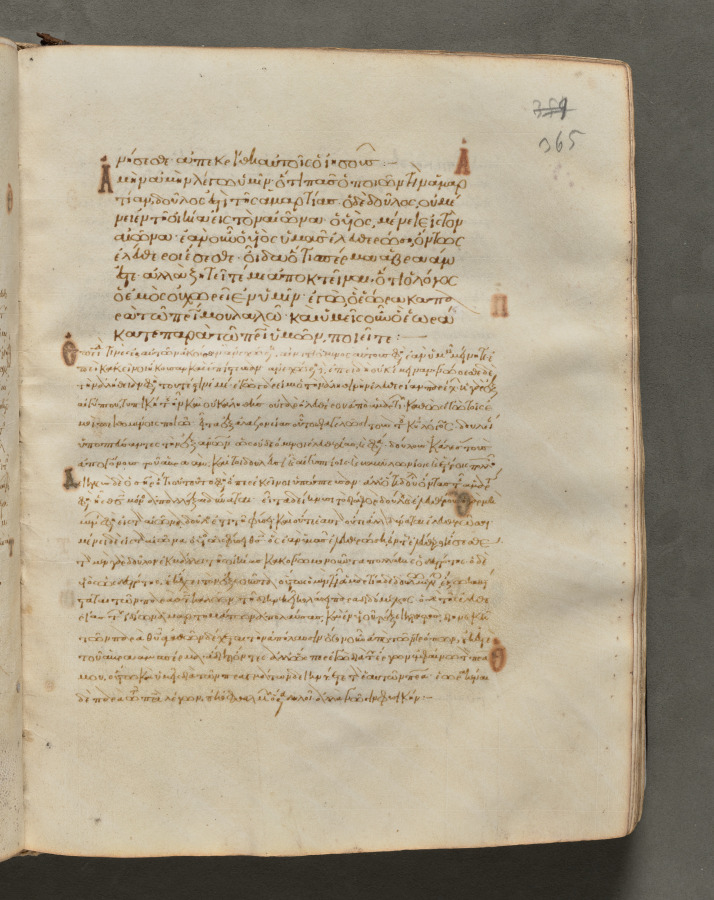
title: Text, folio 365 (recto), from a Gospel Book with Commentaries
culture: Byzantium, Constantinople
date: c. 1000–1100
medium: ink, tempera, and gold on vellum; leather binding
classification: Bound Volume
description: Each of the four gospels in this book opens on a page with brilliantly illuminated borders depicting the author of the text as well as birds—principally peacocks, symbols of the immortality of the soul—and fountains, representing the fountain of life and the salvation of the soul. This volume consists of 428 leaves with texts in Greek. Its level of sophistication suggests that it was probably written and decorated in a monastery in Constantinople.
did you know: Gospel books were carried in procession through Byzantine churches.